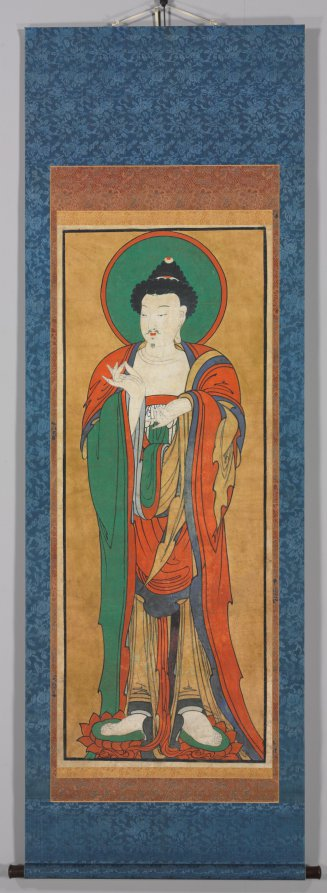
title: Tathagata Buddha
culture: Korea, Joseon dynasty (1392–1910)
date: late 1800s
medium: hanging scroll; ink and color on paper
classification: Painting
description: Buddhist paintings of the late Joseon period (from the 17th to the 19th century) have several characteristics different from their precedents. Generally, they were painted in bright mineral pigments on either thick paper or hemp. This large painting, which measures more than 2 meters tall, used to serve as a banner for outdoor Buddhist ceremonies such as the water-and-land rite (水陸會).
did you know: The term Tathāgata can be understood as both "one who has thus gone" and "one who has thus come."